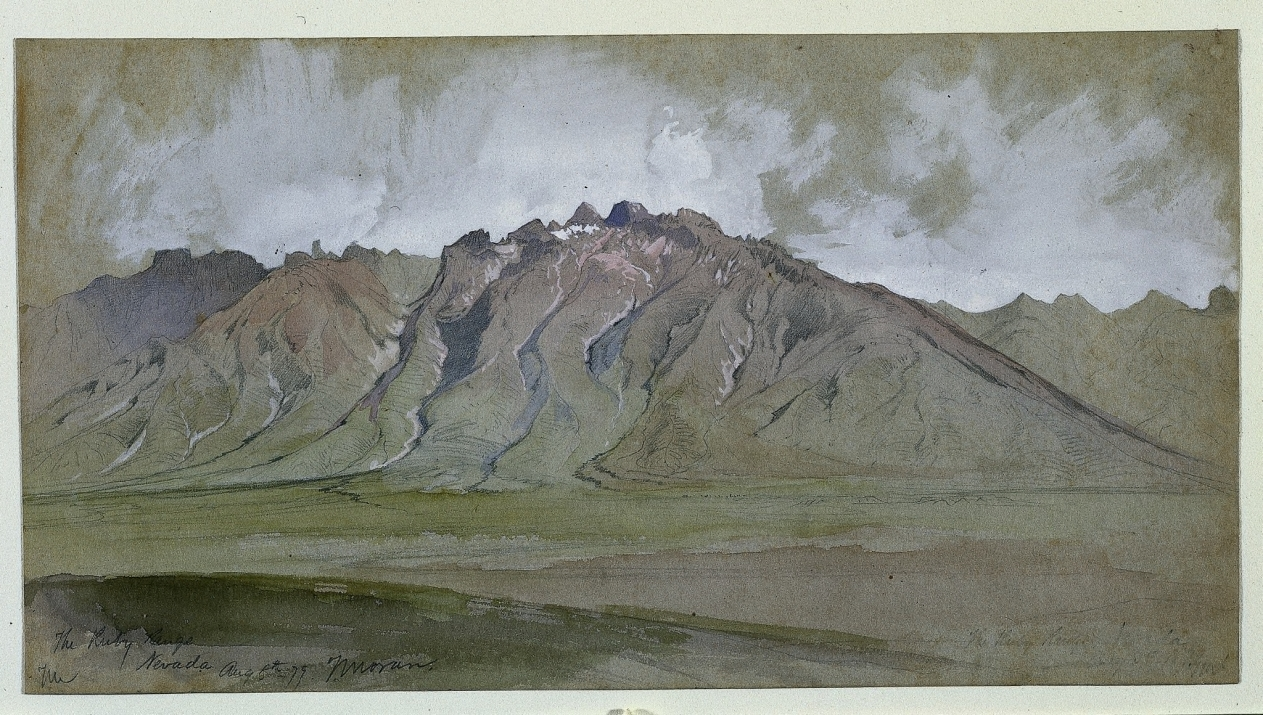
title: The Ruby Range, Nevada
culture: America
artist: Thomas Moran (American, born England, 1837–1926)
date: 1879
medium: watercolor, gouache and graphite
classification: Drawing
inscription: signed, lower left, in graphite: The Ruby Range / Nevada Aug 8th --79. TMoran. / TM ; by artist, lower right, in graphite [partially erased]: The Ruby Range Nevada / Aug 8th TM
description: Thomas Moran is especially well known for his sweeping views of remote areas in the American West. A gifted watercolorist who was deeply influenced by J. M. W. Turner, Moran found a realistic equivalent for the Englishman’s art in the strange hues of the mountains of Wyoming and Nevada, the bubbling springs and vaporous geysers of Yellowstone, and the fantastic rock formations of Arizona. Although he enjoyed dramatic effects, Moran did not exaggerate the spectacular landscapes of the American West; watercolors such as Ruby Range are accurate even in their surprising palettes, achieving an almost visionary intensity.